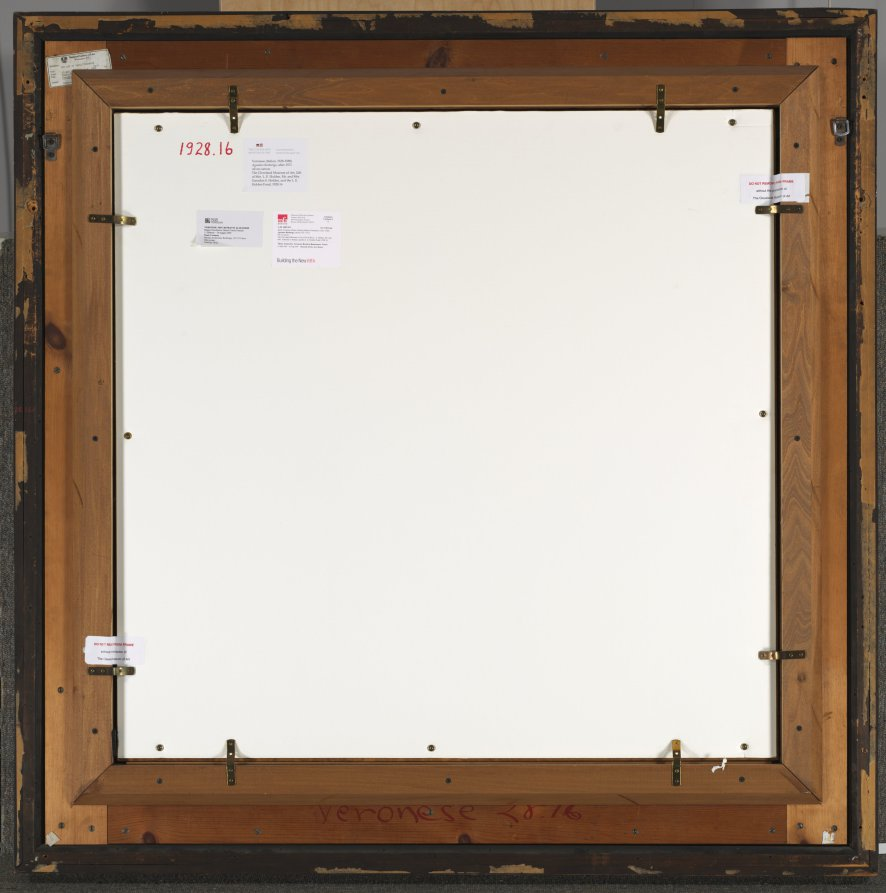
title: Portrait of Agostino Barbarigo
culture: Italy, Venice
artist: Paolo Veronese (Italian, 1528–1588)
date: after c. 1571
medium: oil on canvas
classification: Painting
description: Barbarigo served as second in command of the Venetian naval forces during the Battle of Lepanto, fighting against the Ottoman Empire on October 7, 1571. During the skirmish, Barbarigo was slain by a Turkish arrow, which he holds in the portrait. Barbarigo’s identity is defined by his military prowess. In the 1500s, Venetian military portraits often portrayed the sitter in armor in a pose typical of a Roman emperor, creating a link to the valor and might of ancient armies.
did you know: The arrow symbolically indicates that this portrait was painted after the sitter died in battle.